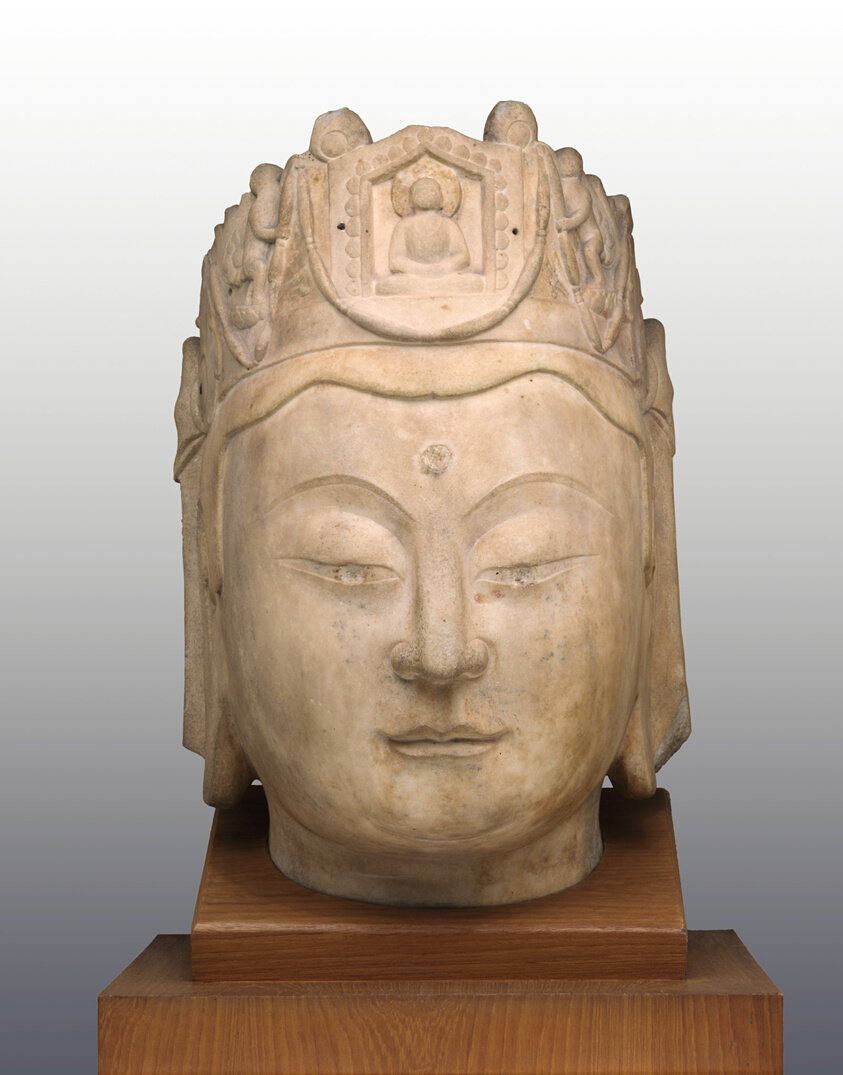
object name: Sculpture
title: Head of Guanyin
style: Chinese (culture or style)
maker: China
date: late Northern Qi/Sui dynasty, late 6th century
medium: Marble with traces of metal fittings at crown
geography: China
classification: marble; stone; sculpture; asian art